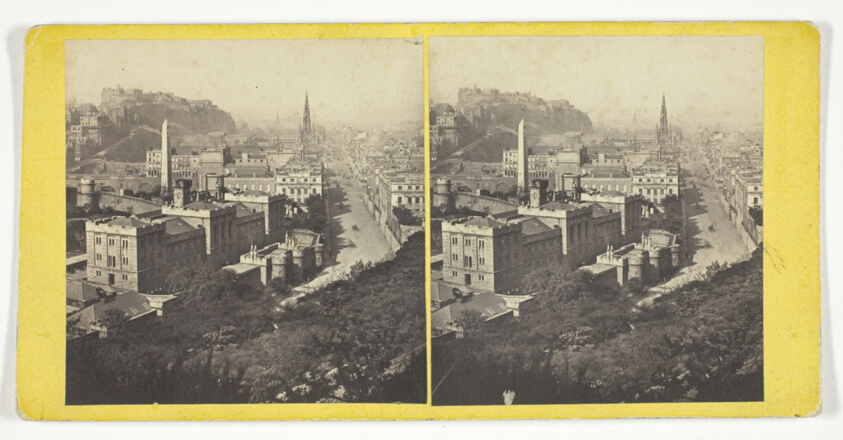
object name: Photograph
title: Edinburgh, from the Calton Hill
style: 19th century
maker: G. W. Wilson (Scottish, 1823–1893)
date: Mid 19th century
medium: Albumen print, stereo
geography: Scotland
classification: photography; photograph